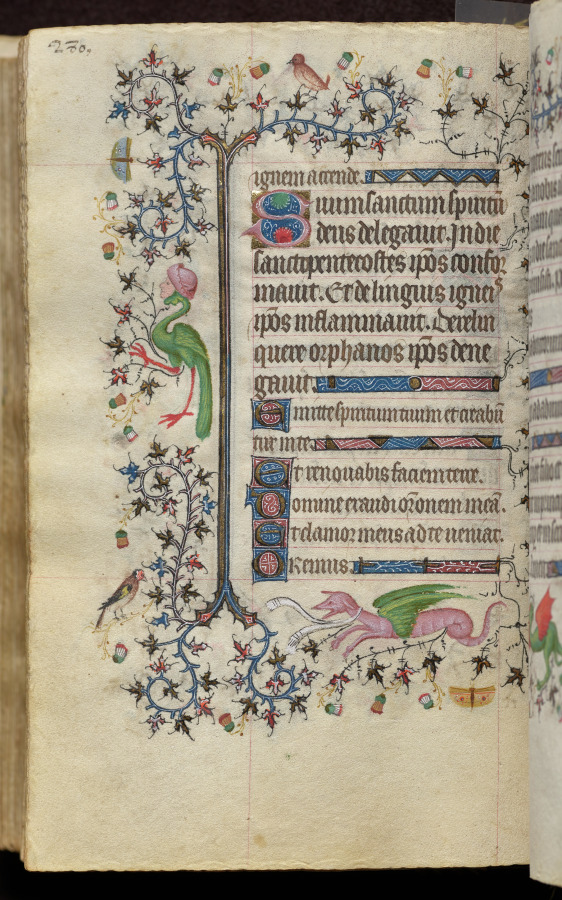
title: Hours of Charles the Noble, King of Navarre (1361-1425): fol. 140v, Text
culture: France, Paris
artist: Master of the Brussels Initials and Associates (French)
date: c. 1405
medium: ink, tempera, and gold on vellum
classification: Bound Volume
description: This precious volume was obviously highly prized by its owner, the French-born King of Navarre, who had his coat of arms painted on no less than twenty folios. Rather than directly commissioning this manuscript from a specific workshop, it seems that Charles the Noble acquired his book of hours -- perhaps ready-made for the luxury market -- while on a trip to Paris in 1404-05. A collaborative effort, six painting styles are evidenced within the pages of this codex, those of two Italians, two Frenchmen, and two Netherlanders. The painter who was responsible for the planning and decoration of the book, and who produced seventeen of the large miniatures, was a Bolognese artist known as the Master of the Brussels Initials. His principal assistant, responsible for most of the borders, was a Florentine who signed his name "Zecho" da Firenze on folio 208 verso.